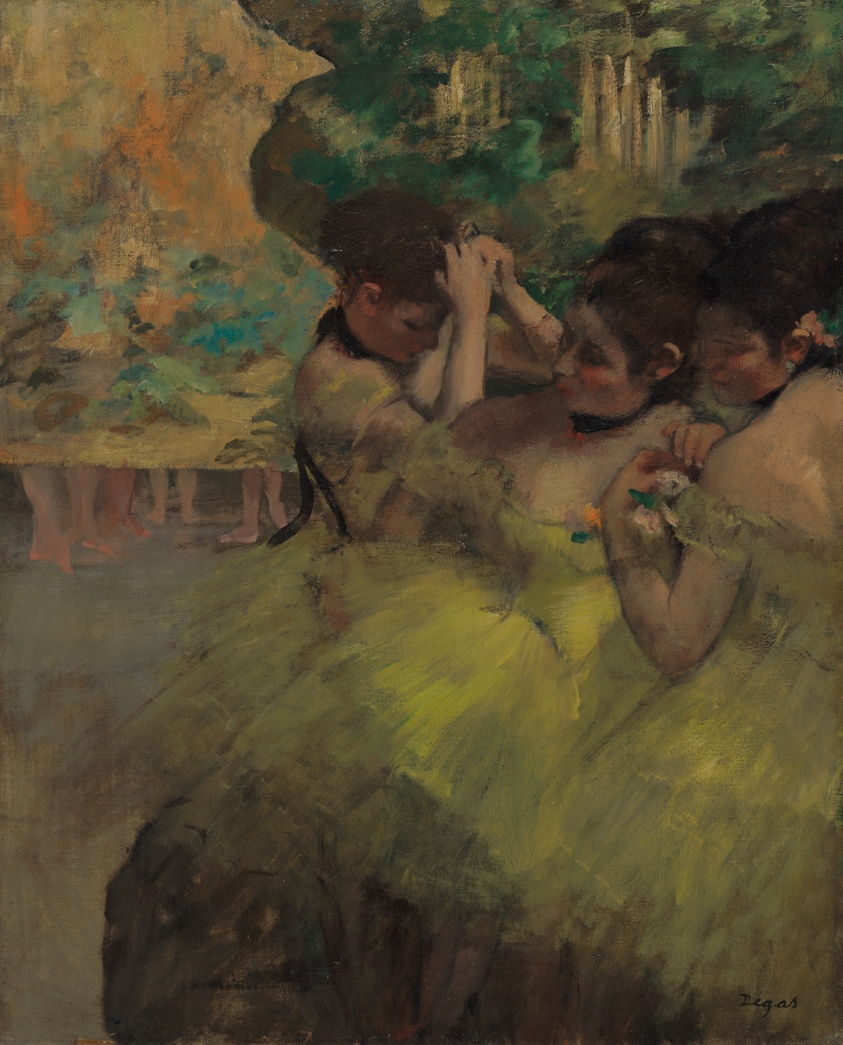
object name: Painting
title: Yellow Dancers (In the Wings)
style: Impressionism, 19th century, nineteenth century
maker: Edgar Degas (French, 1834–1917)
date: 1874–76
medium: Oil on canvas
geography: France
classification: painting; france; french; oil on canvas; oil paintings (visual works); paint; european painting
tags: ballet, French, France, screen, costume, dresses, flowers, yellow (color), work, dancers, leisure, women, Century of Progress, world's fairs, Chicago World's Fairs